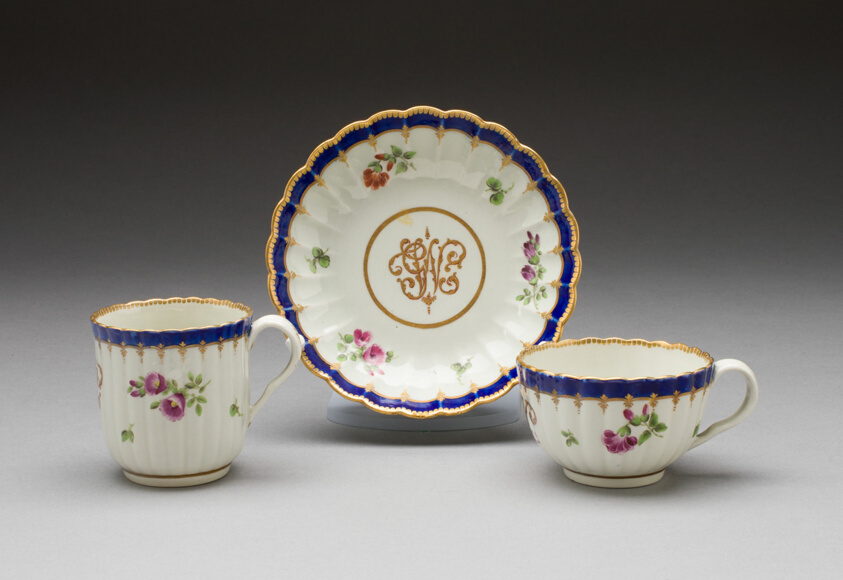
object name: Ceramics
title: Teacup, Coffee Cup, and Saucer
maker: Worcester Porcelain Factory (Warmstry House Period, 1751–1783); Worcester, England, founded 1751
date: 1775/80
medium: Soft-paste porcelain with polychrome enamels and gilding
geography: Worcester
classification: drinking vessel; teaware; ceramics; porcelain; european decorative arts